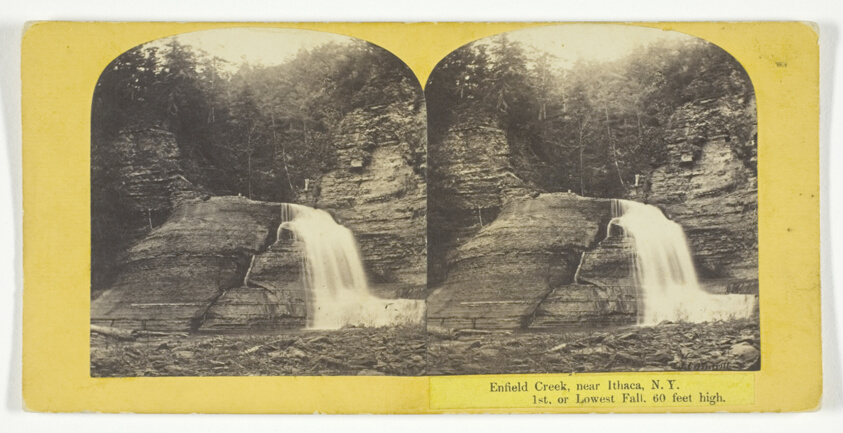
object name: Photograph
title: Enfield Creek, near Ithaca, N.Y. 1st, or Lowest Fall, 60 feet high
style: 19th century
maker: J. C. Burritt; American, active 1860s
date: 1860/65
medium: Albumen print, stereo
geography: Ithaca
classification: photography; photograph; albumen silver print; stereograph (albumen)